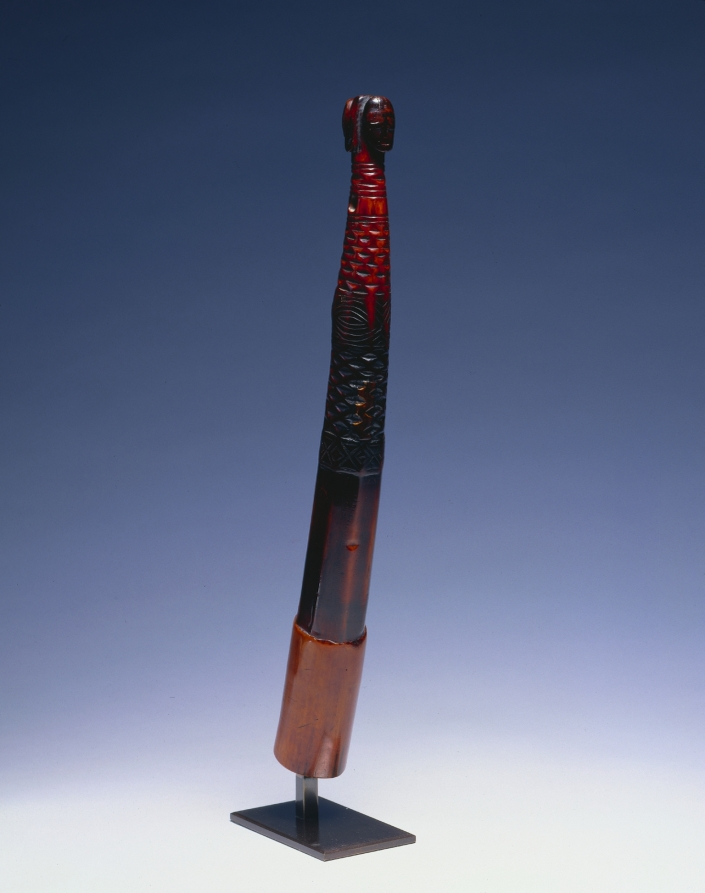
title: Side-Blown Trumpet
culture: Equatorial Africa, Cameroon; Fang, 19th century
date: late 1800s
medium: Elephant ivory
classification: Musical Instrument